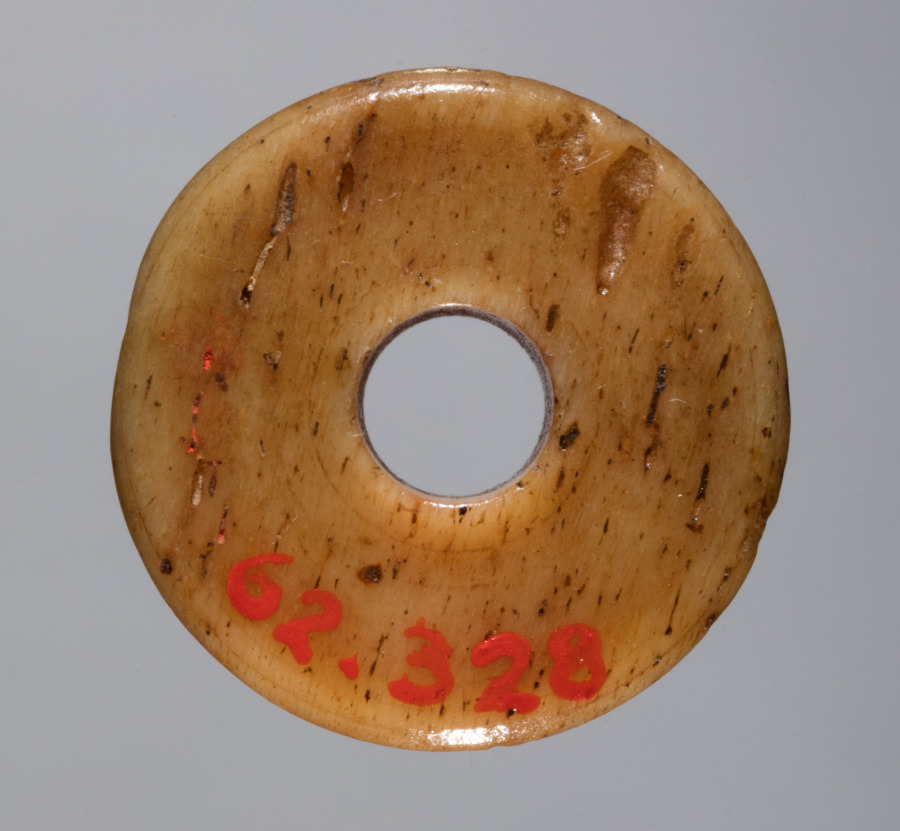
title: Spindle Whorl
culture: Iran, early Islamic period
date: 700s - 900s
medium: bone, incised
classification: Spindle Whorl